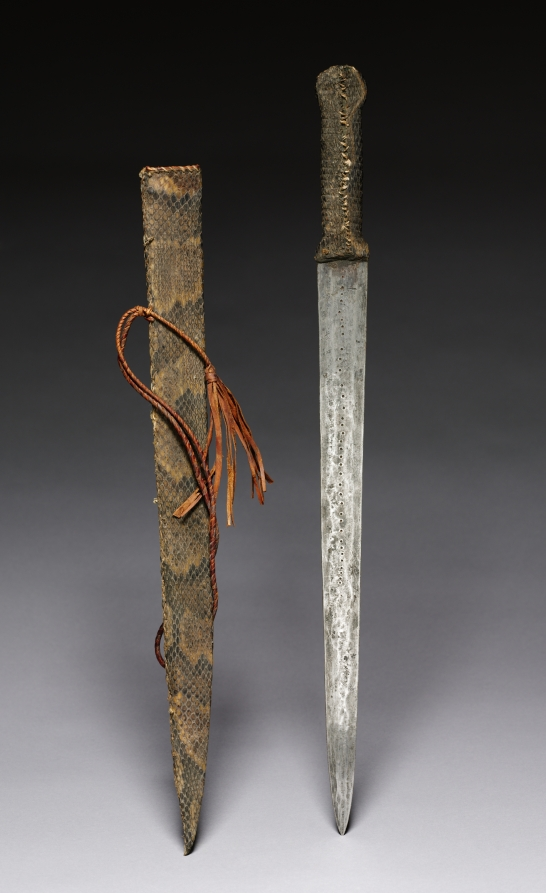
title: Dagger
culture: Africa, Sudan, reportedly Darfur, unknown maker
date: 1900s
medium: Iron, repitle skin, and leather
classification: Arms and Armor